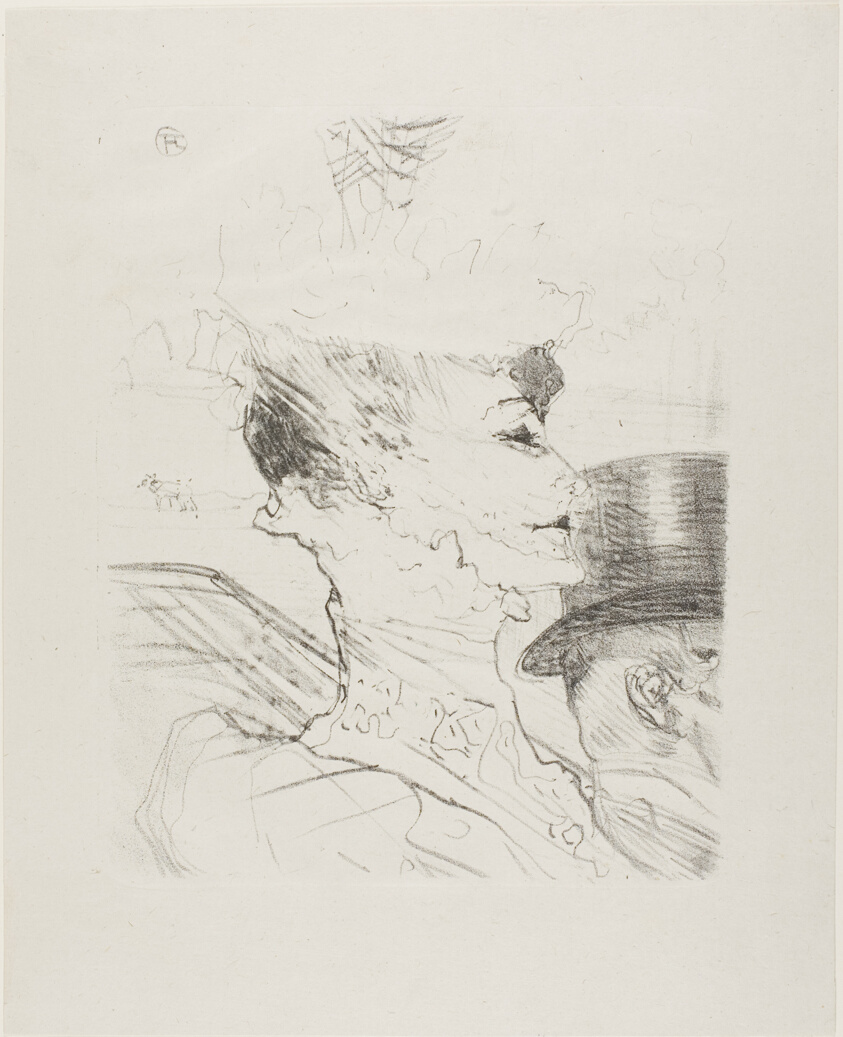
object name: Print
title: Louise Balthy, from Treize Lithographies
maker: Henri de Toulouse-Lautrec (French, 1864-1901)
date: 1898, published before 1906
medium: Lithograph on ivory laid paper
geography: France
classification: lithograph; print; prints and drawing